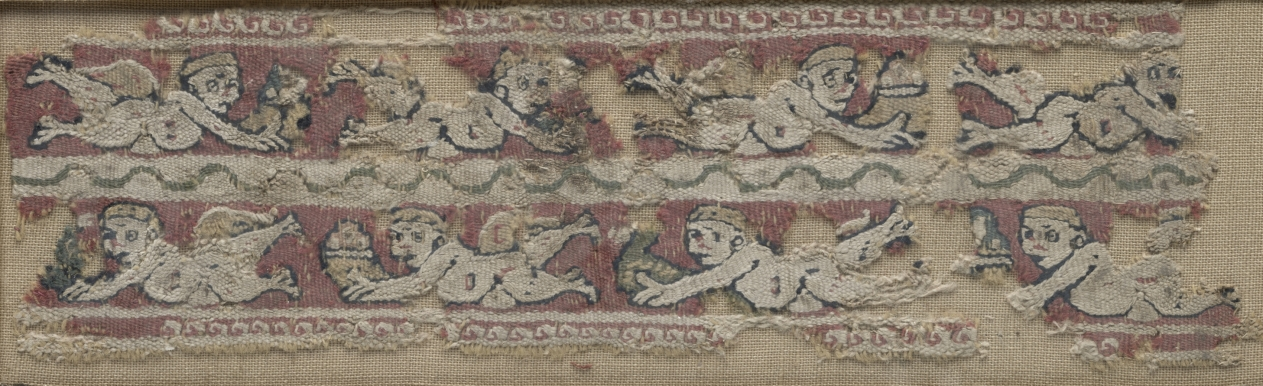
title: Fragment of a Sleeve Band with Floating Erotes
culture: Egypt, 7th - 8th century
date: 600s - 700s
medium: tapestry; linen and wool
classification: Textile